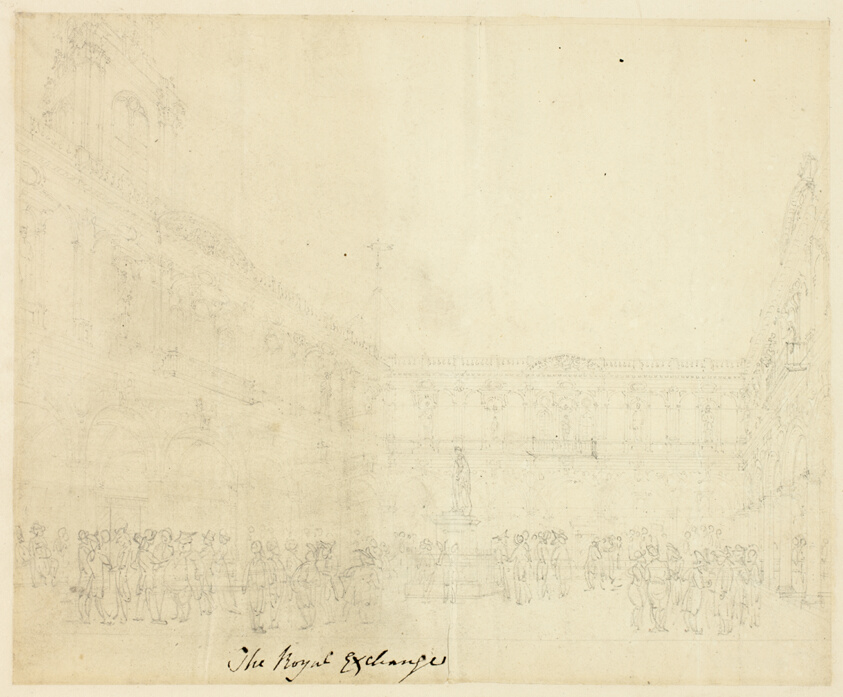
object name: Drawing and Watercolor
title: Study for The Royal Exchange, from Microcosm of London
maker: Augustus Charles Pugin (English, born France, 1762-1832); Thomas Rowlandson (English, 1756-1827)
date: c. 1809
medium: Graphite on cream wove paper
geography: England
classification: graphite; drawings (visual works); prints and drawing